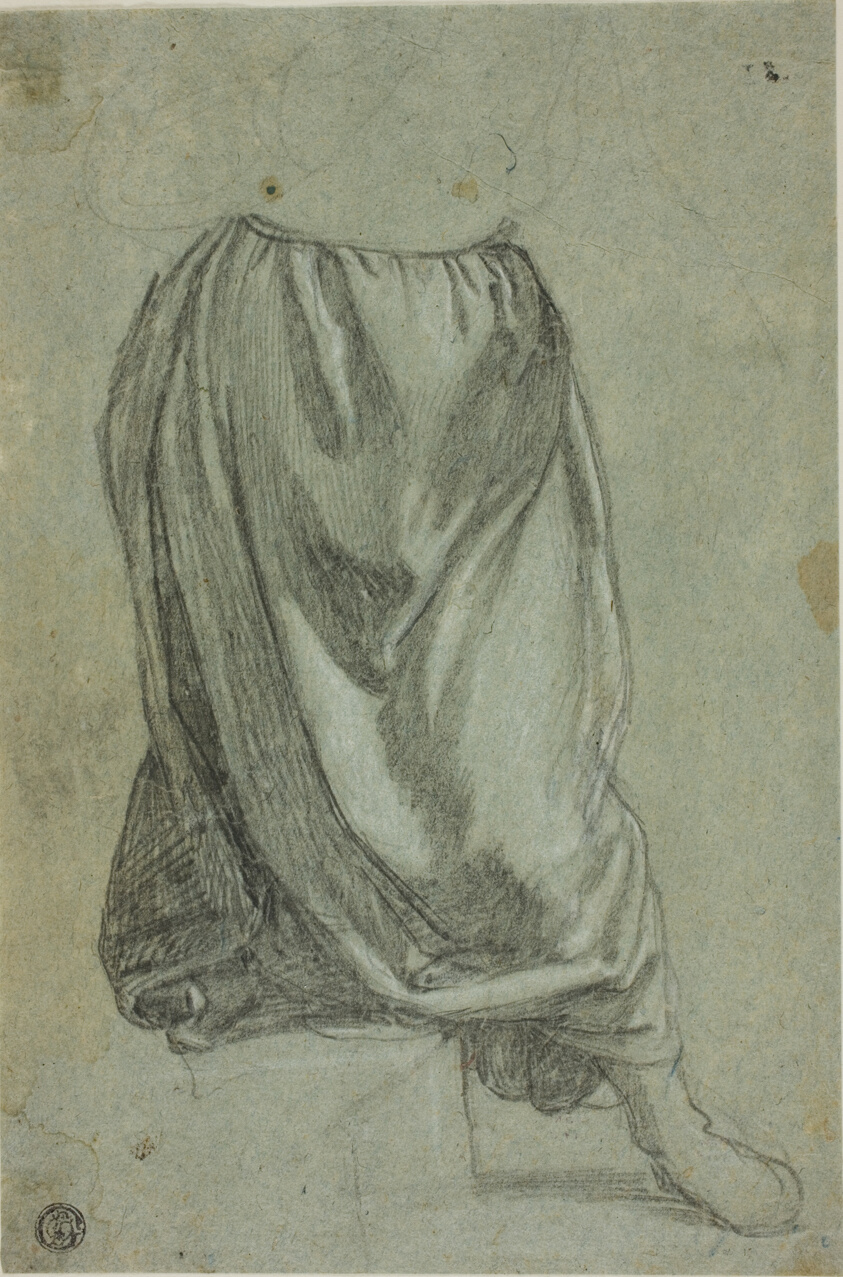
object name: Drawing and Watercolor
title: Drapery Sketch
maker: Unknown artist; Italian, 17th century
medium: Black chalk, heightened with white chalk, on blue laid paper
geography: Italy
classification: chalk; paper; drawings (visual works); prints and drawing